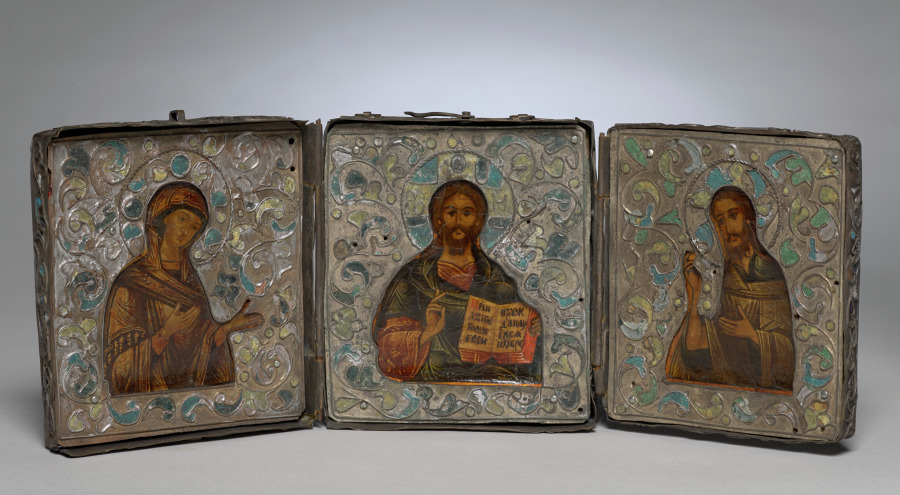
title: Triptych with Christ, the Virgin, and St. John the Evangelist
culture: Russia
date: 1800s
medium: pigment on wood, in cloisonné enamelled insert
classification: Painting